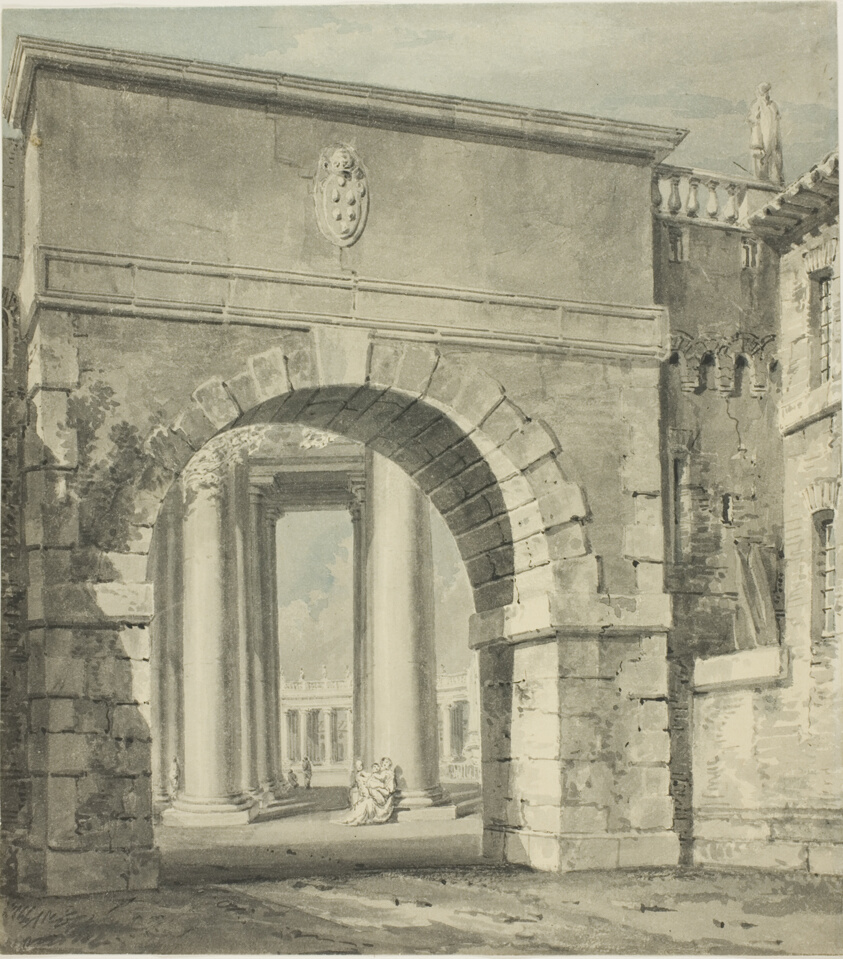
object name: Drawing and Watercolor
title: St. Peter’s Seen Through the Porta Angelica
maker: Joseph Mallord William Turner (English, 1775-1851)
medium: Watercolor on paper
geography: England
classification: watercolor; drawings (visual works); prints and drawing